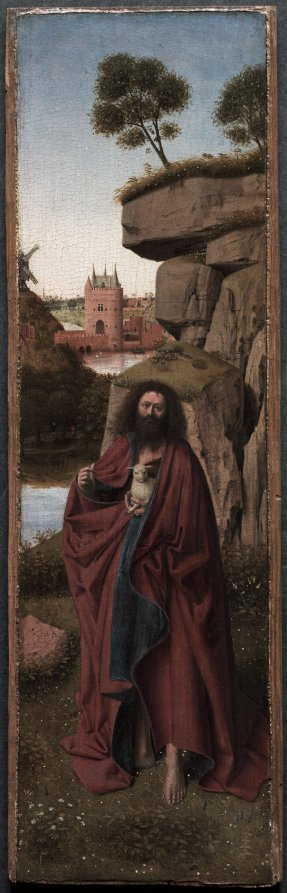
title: Saint John the Baptist in a Landscape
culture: Flanders, Bruges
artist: attributed to Petrus Christus (Netherlandish, c. 1410–1475/76)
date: c. 1445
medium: oil on panel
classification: Painting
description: The overall style of this painting suggests that it was painted by an artist closely associated with the Netherlandish painter Jan van Eyck. The facial structure of the saint as well as the artist’s treatment of his cloak are typical of van Eyck’s follower, Petrus Christus. Christus was active in the city of Bruges and was a probable pupil and successor to Jan van Eyck, with whom his paintings have often been confused. Here, Christus depicts John the Baptist as an isolated, monumental figure without his typical hairshirt or other references to his life. This approach is derived from Claus Sluter’s monumental image of Saint John from the portal at Champmol and from manuscript illuminators working for Philip the Bold and his brother Jean de Berry. Here, John holds the Lamb of God, a symbol of Christ’s sacrifice and a reference to John’s proclamation of Christ’s redemption of humankind. Upon his death, Christus was succeeded by Hans Memling as the next great painter in Bruges.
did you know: In the background is the Blacksmith's Gate, originally built in 1297, which still stands in the city Bruges, although it has been rebuilt multiple times over the centuries.